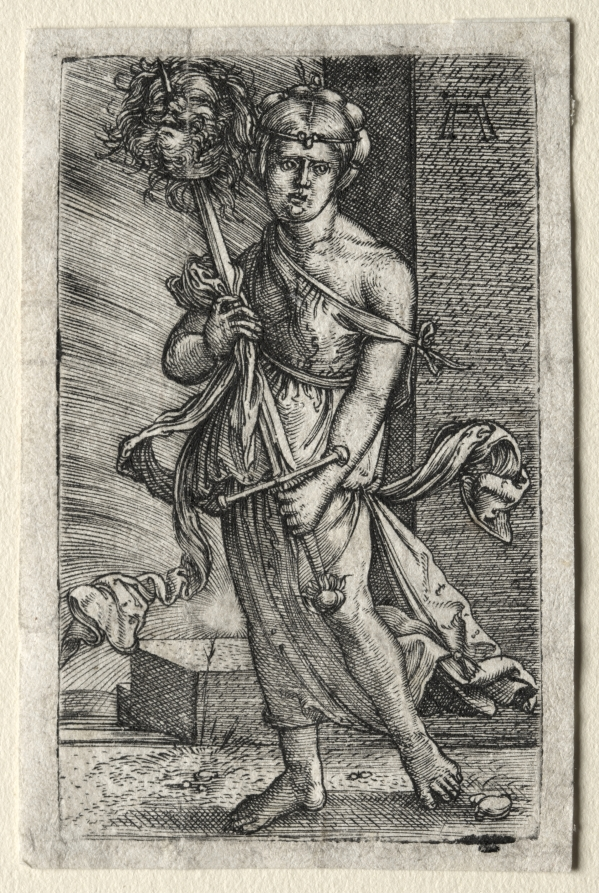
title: Judith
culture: Germany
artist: Albrecht Altdorfer (German, c. 1480–1538)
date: 1520–1526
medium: engraving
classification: Print